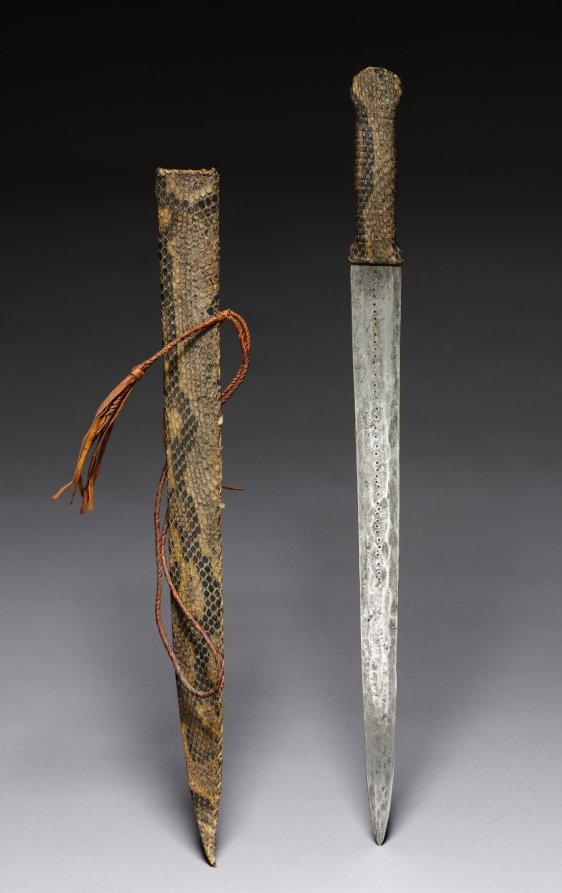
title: Dagger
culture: Africa, Sudan, reportedly Darfur, unknown maker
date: 1900s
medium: Iron, repitle skin, and leather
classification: Arms and Armor